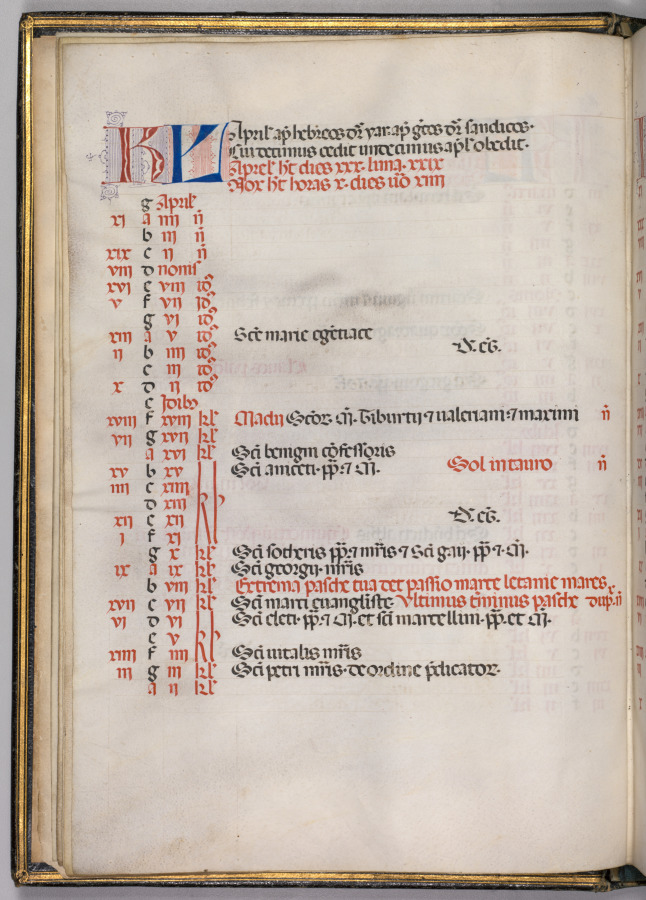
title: Missale: Fol. 4v: April Calendar Page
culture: Italy, Perugia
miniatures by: Bartolommeo Caporali (Italian, c. 1420–1503)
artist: assisted by Giapeco Caporali (Italian, d. 1478)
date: 1469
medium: ink, tempera and burnished gold on vellum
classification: Bound Volume